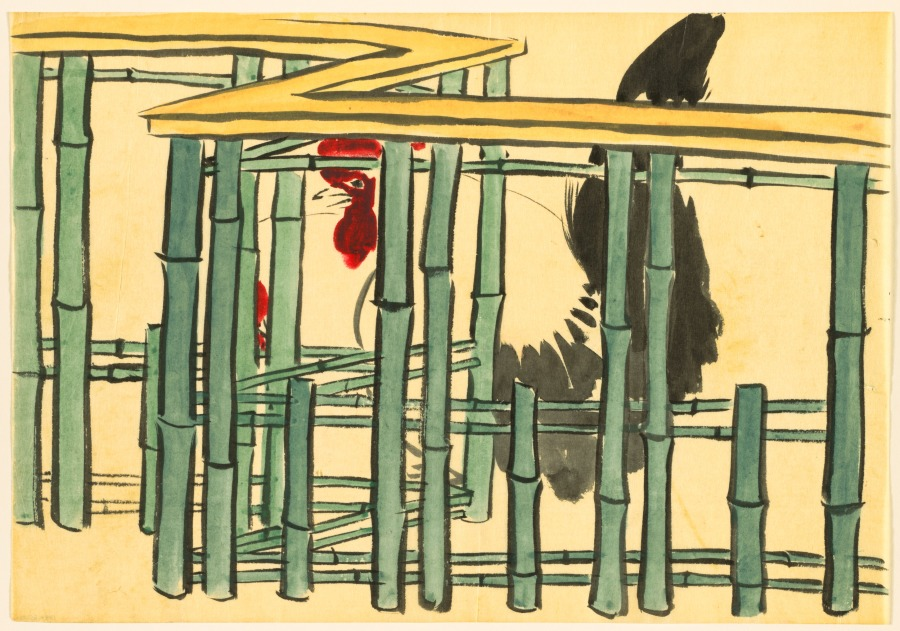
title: Flowers of a Hundred Worlds (Momoyogusa): Rooster (Chabo)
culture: Japan, Meiji period (1868–1912)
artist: Kamisaka Sekka (Japanese, 1866–1942)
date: 1909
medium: ink and color on paper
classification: Drawing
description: Kamisaka Sekka made preparatory drawings for his Flowers of a Hundred Worlds series on tracing paper with ink and color. The freehand sketches are much looser than the finished, printed compositions.